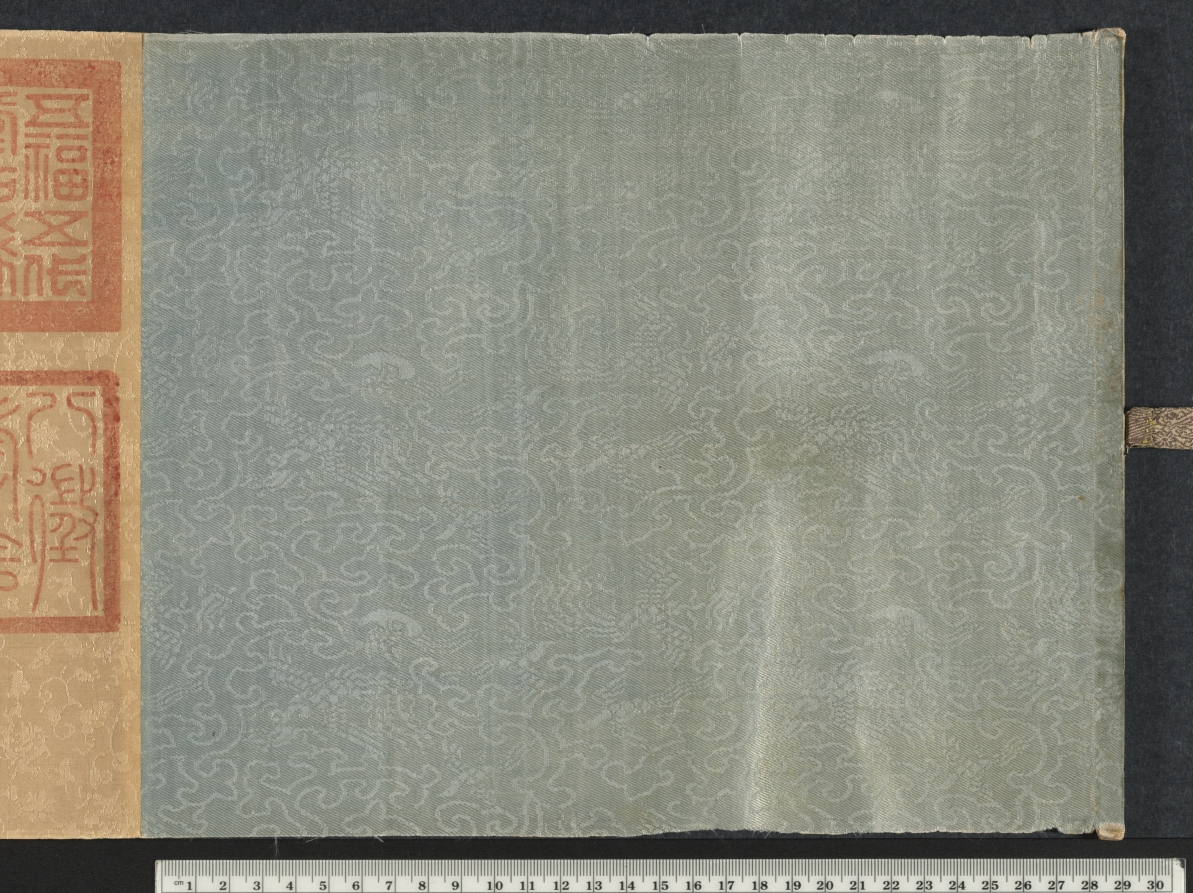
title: "Seventh Month" from the Odes of Bin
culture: China, Southern Song dynasty (1127-1279)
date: 1200s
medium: Handscroll; ink and color on silk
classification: Painting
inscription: Colophons: 1. [on the frontispiece] by the Qianlong emperor (dated 1741). 2. by Lu Wan (dated Zhengde dingchou, 1517). 2. by the Jiaqing emperor (dated 1807).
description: According to Confucian thought, the ruler looks after the well-being of his people which involves agricultural activities. Seventh Month from the ancient Odes of Bin in the Shijing (Book of Poetry) describes occupations throughout the year, including plowing, harvesting, hunting, making clothes, and observing rituals. The earliest illustrations of these Odes accompanied by text were commissioned by Southern Song emperor Gaozong (reigned 1127–1162). As the lower Yangzi delta had become the new seat of government, Gaozong had sets of these illustrations produced by court artists to revive the dynasty and convince the Confucian officialelite of his legitimacy to rule.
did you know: The Odes of Bin appears in the classic Shijing (Book of Poetry), an anthology of more than 300 poems, folk songs, and ceremonial hymns that were originally chanted to music.